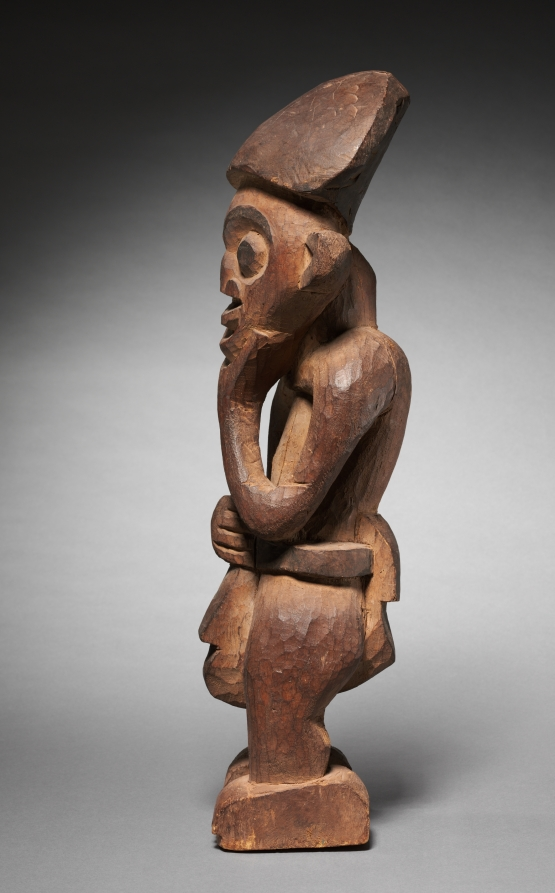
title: Royal Retainer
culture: Equatorial Africa, Cameroon, Bamum, early 20th century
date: early 1900s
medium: wood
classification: Sculpture